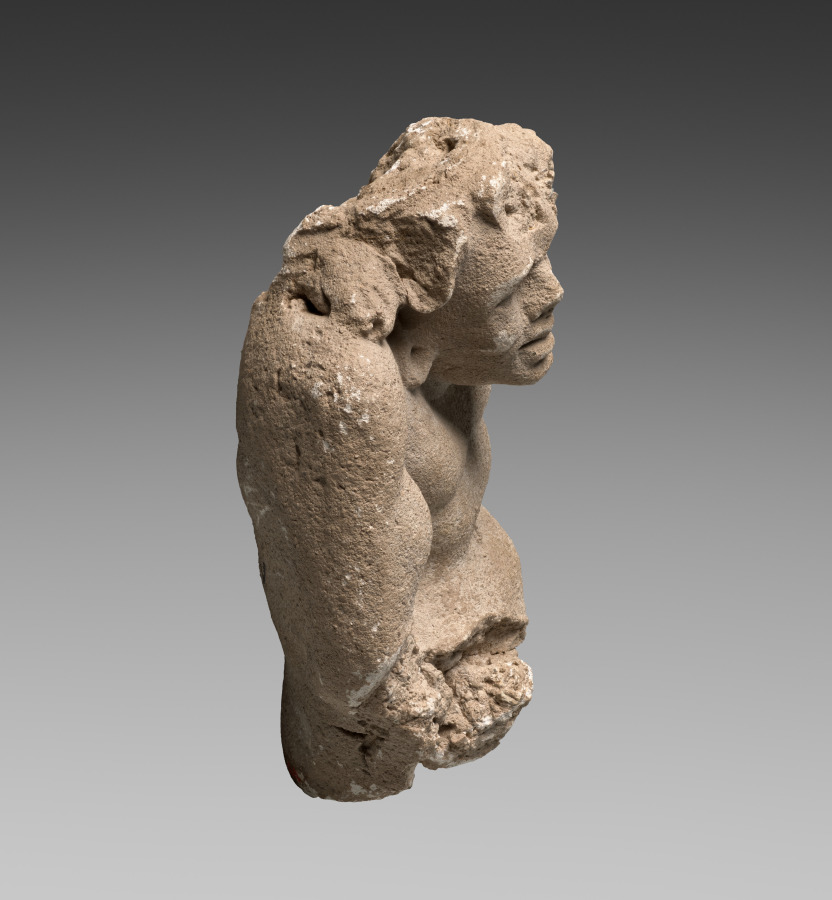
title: Male Atlantean figure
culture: Afghanistan, Hadda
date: c. 300 CE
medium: stucco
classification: Sculpture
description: The musculature, thick curly locks of hair, and deeply inset eyes of this fragmentary figure show the sculptor's incorporation of Greco-Roman forms. His hunched posture suggests that he supported a heavy weight, such as the dome of a stupa on his back. Rows of figures would have visually supported the stupa, in which relics of the Buddha or other revered Buddhist leader were interred.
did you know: Most sculptures from Hadda are preserved in museums, since the site was razed in 2001.